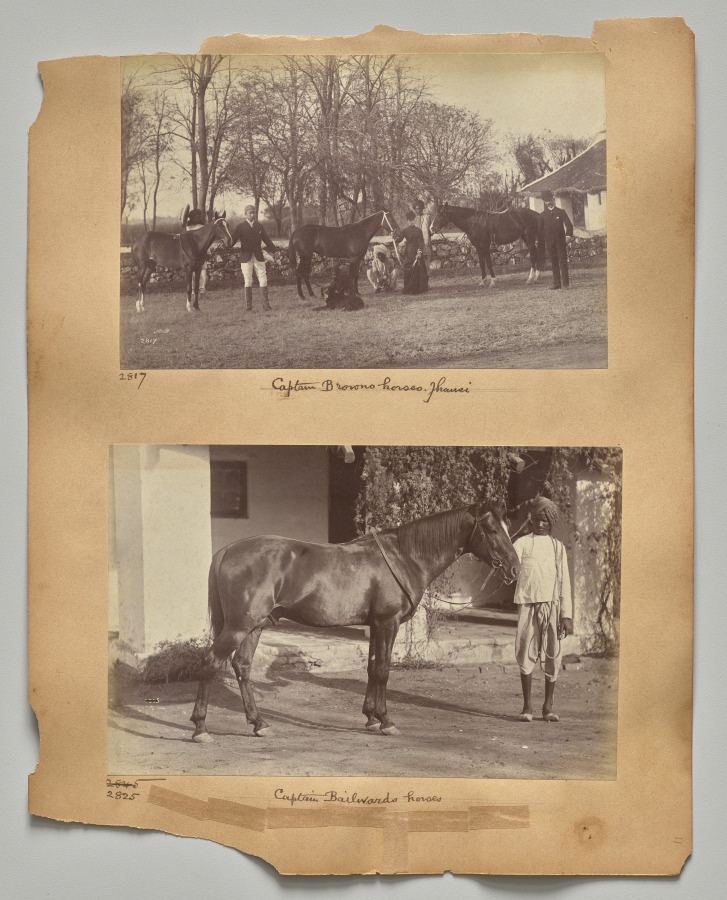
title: Captain Brown's horses, Jhansi (recto, top)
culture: India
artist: Raja Deen Dayal (Indian, 1844–1905)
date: c. 1882–87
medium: albumen print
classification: Photograph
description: These photographs are part of an album, now disassembled, of around 105 photographs taken in India between 1885 and summer 1887 that provide glimpses into the lives of the British colonial elite and royal and upper-class Indians. The museum holds another group of 37 pictures from this album (2016.266), which was probably commissioned by a British civil servant visiting or working in India around 1888 as a personal souvenir of his experiences there.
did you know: Raja Deen Dayal is regarded now, and was considered during his lifetime, to be India’s most important 19th-century photographer.